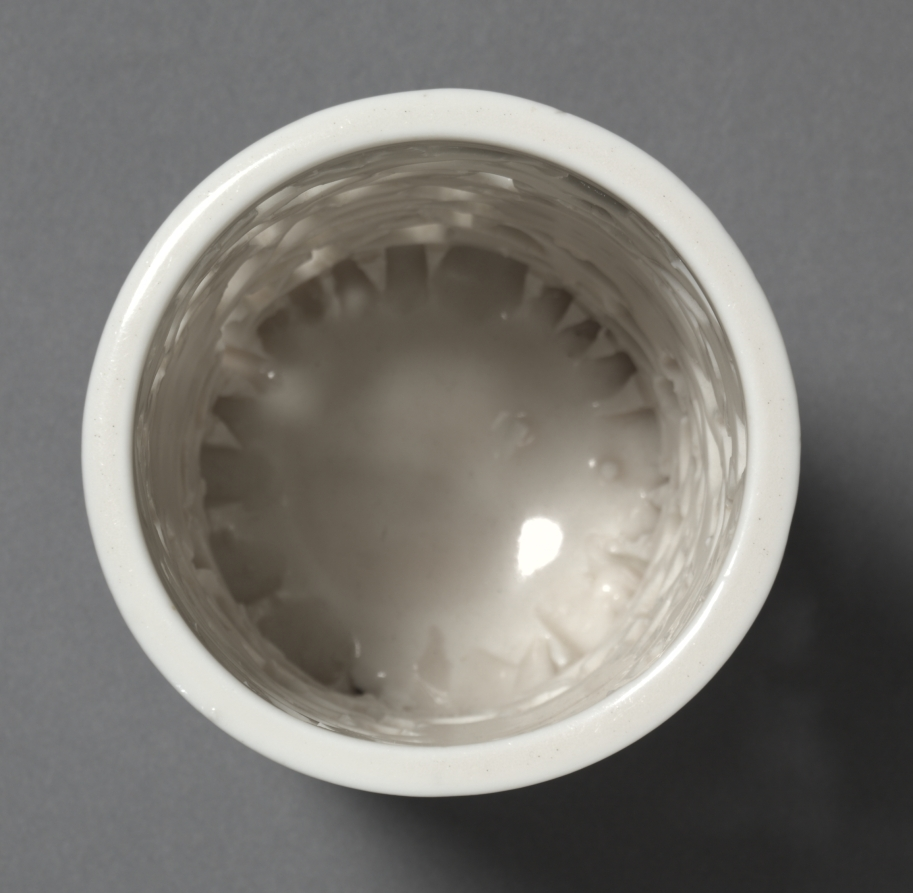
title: Brush Pot with Peonies: Dehua Ware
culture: China, Fujian province, Qing dynasty (1644-1911)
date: 1644–1911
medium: glazed porcelain with pierced and incised decoration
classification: Ceramic